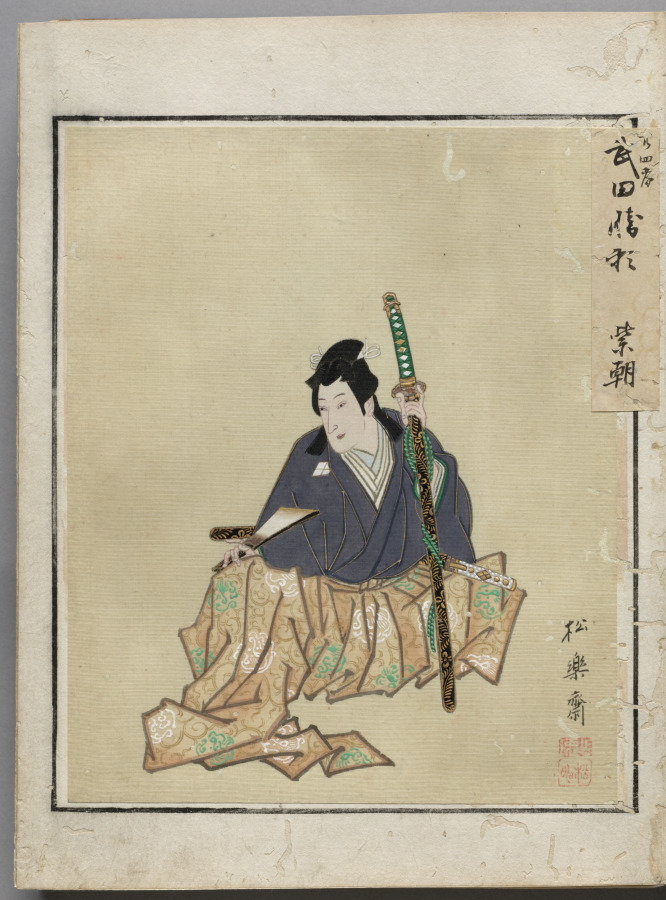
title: Double-Leaf from Album of Actor Portraits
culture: Japan, Edo period (1615–1868)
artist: Shōrakusai (Japanese)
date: c. 1790–1810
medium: double-leaf from accordion-style album; ink on paper (right) and and ink and color on silk (left)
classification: Bound Volume